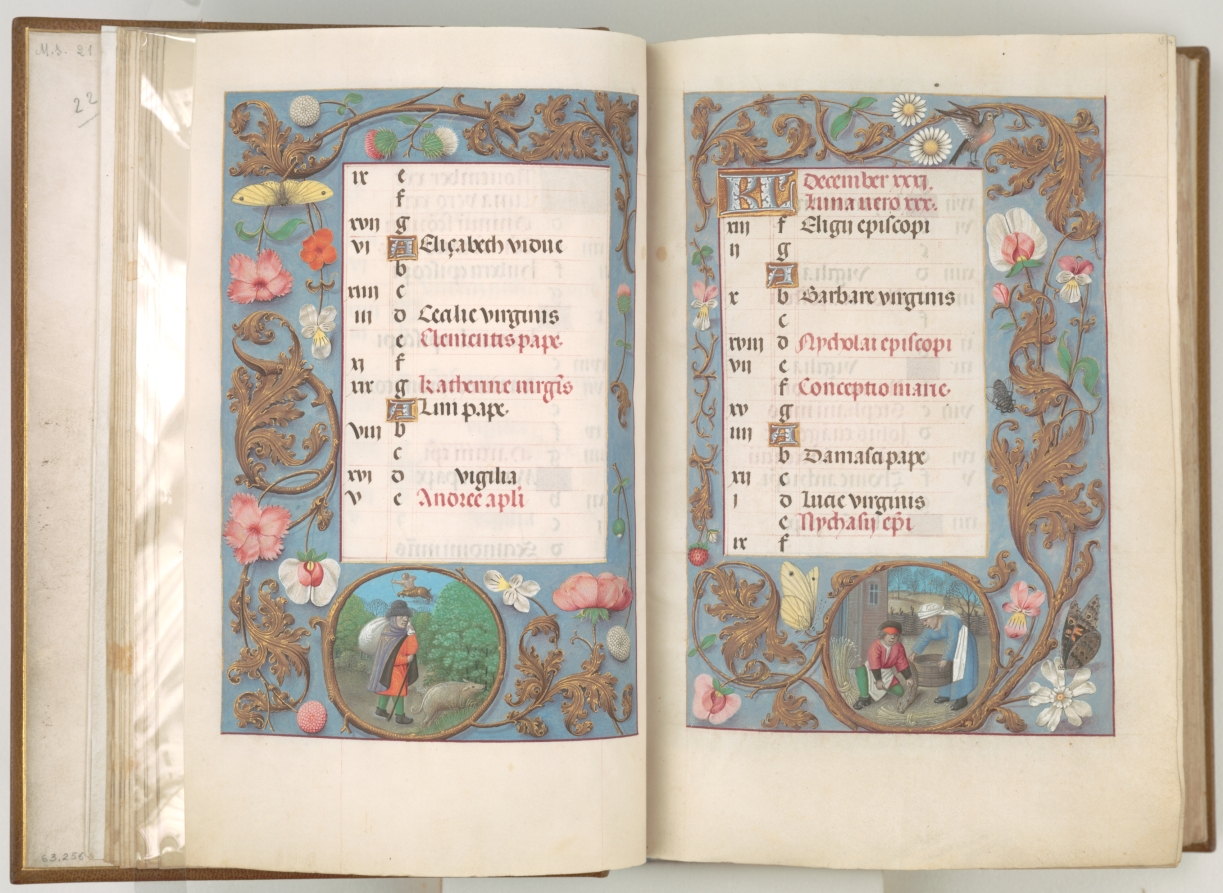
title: Hours of Queen Isabella the Catholic, Queen of Spain: Fol. 12v, November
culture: Flanders, Ghent and Bruges, late 15th century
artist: Master of the First Prayerbook of Maximillian (Flemish, c. 1444–1519)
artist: and Associates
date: c. 1500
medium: ink, tempera, and gold on vellum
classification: Bound Volume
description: This manuscript was illuminated by a circle of at least five highly organized manuscript painters active in the Flemish cities of Ghent and Bruges. The principal illuminator was Alexander Bening, who painted the majority of the book's miniatures. Manuscripts produced by this circle of artists are renowned for the decoration of their borders, which typically feature a rich variety of realistically-painted flowers, birds, and butterflies. This prayer book, called a book of hours, was intended not for a cleric, but for the private devotions of a lay person-in this case, Isabella the Catholic, Queen of Spain (1451-1504). Isabella's coat of arms embellishes the book's frontispiece. It is unlikely that the book was commissioned by the Queen herself; rather, she probably received it as a diplomatic gift from someone courting her patronage, perhaps Cardinal Francisco Jimenez de Cisneros. A Franciscan friar, Jimenez was dependent upon Isabella for his advancement, first to the post of Queen's confessor in 1492, and then to Archbishop of Toledo in 1495.